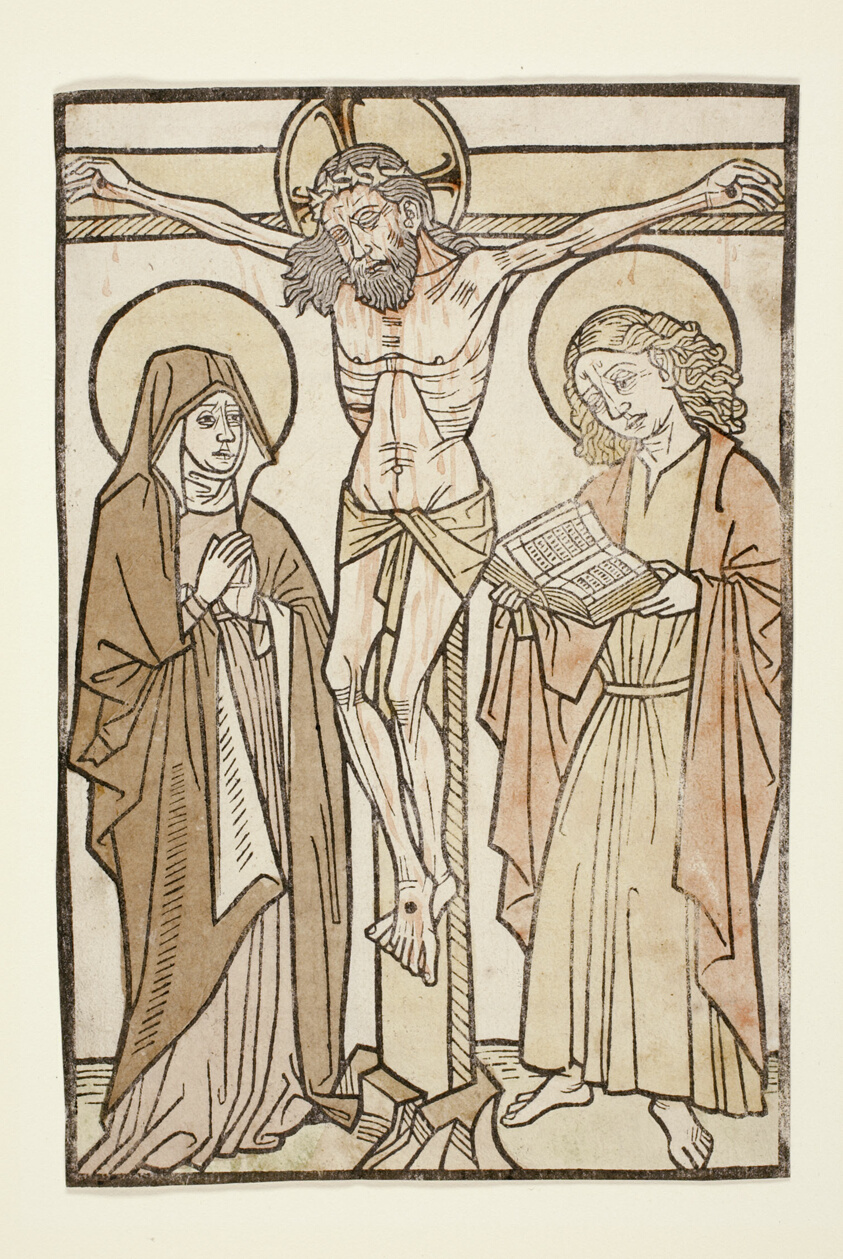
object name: Print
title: Christ on the Cross Between Mary and Saint John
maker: Unknown Artist; Southern Germany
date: 1460/70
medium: Handcolored woodcut, printed through rubbing, on paper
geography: Southern Germany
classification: woodcut; print; prints and drawing